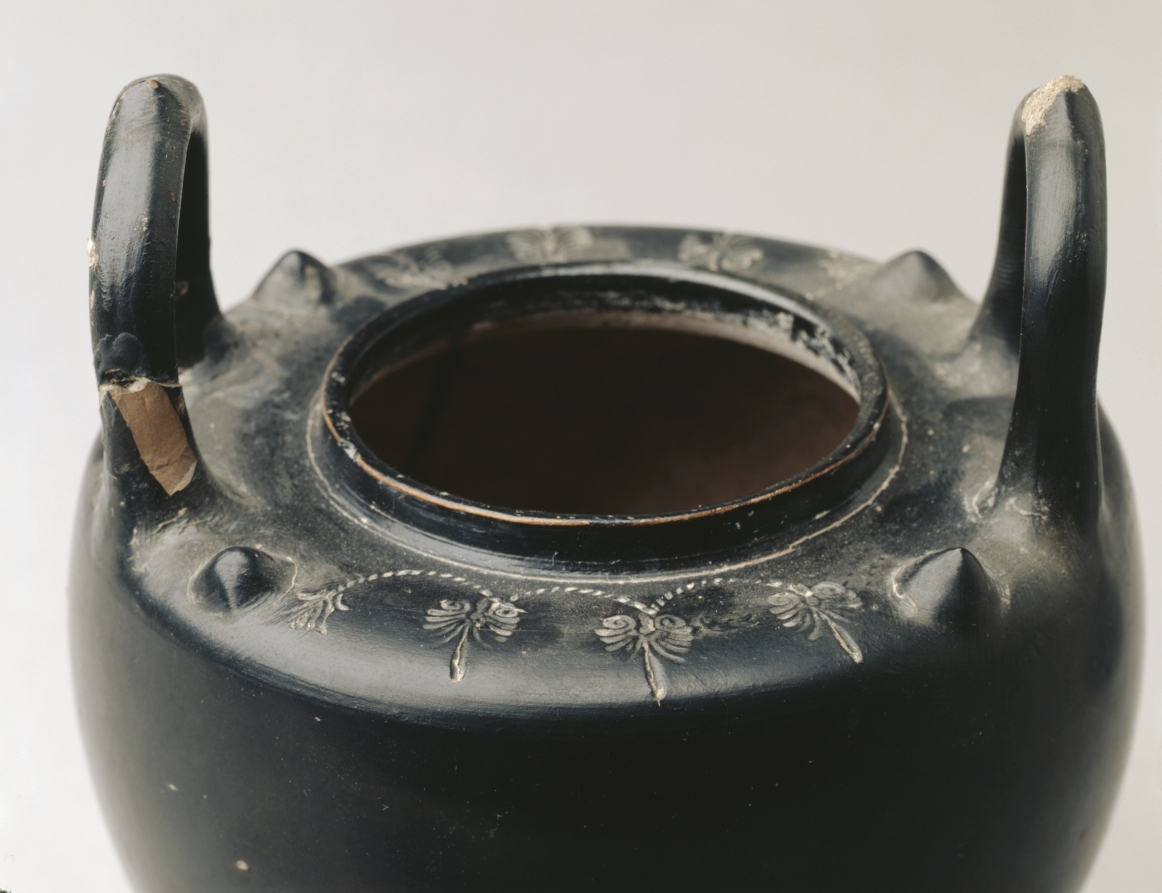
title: Black-Gloss Lebes Gamikos (Nuptial Bowl)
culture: Greek or South Italian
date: c. 425–375 BCE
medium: ceramic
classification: Ceramic